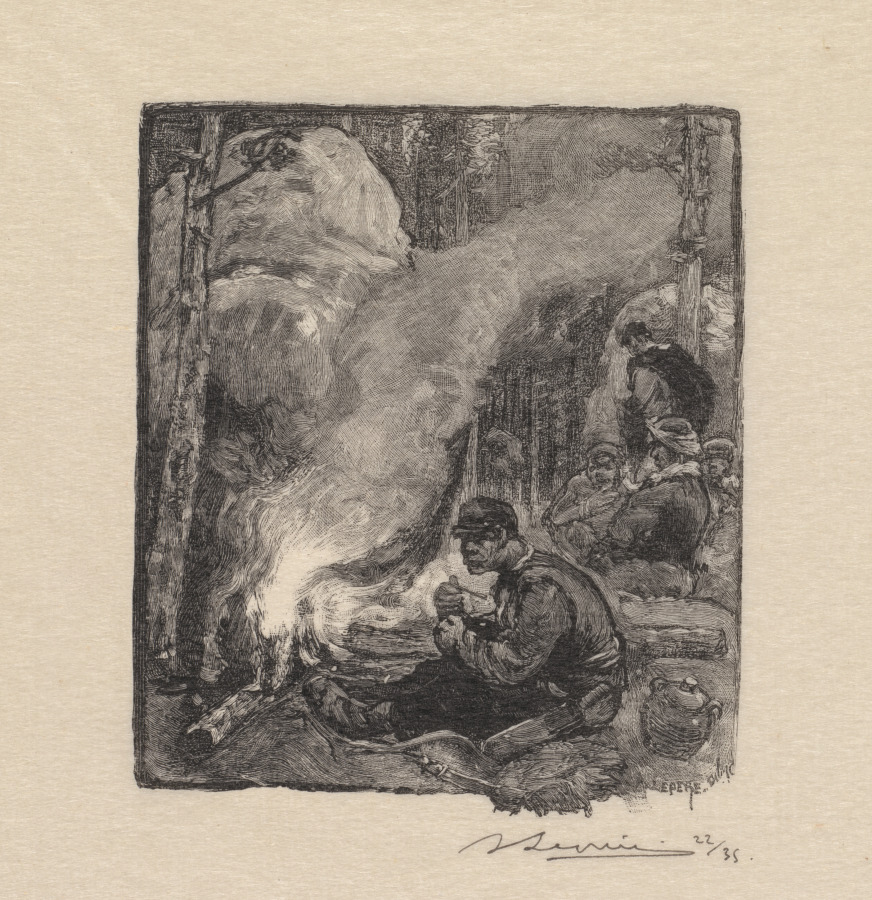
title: Woodcutters' Meal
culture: France, 19th century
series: Fontainebleau Forest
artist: Auguste Louis Lepère (French, 1849–1918)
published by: A. Desmoulins, Published in Revue Illustrée, 1887–90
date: 1890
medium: wood engraving from bound volume of 34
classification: Bound Volume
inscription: Below image, lower right, in black ink: ALepère 22/35; on block, lower right: ALepère del. sc. On window mat, lower right, in graphite: Le repas des Bûcherons